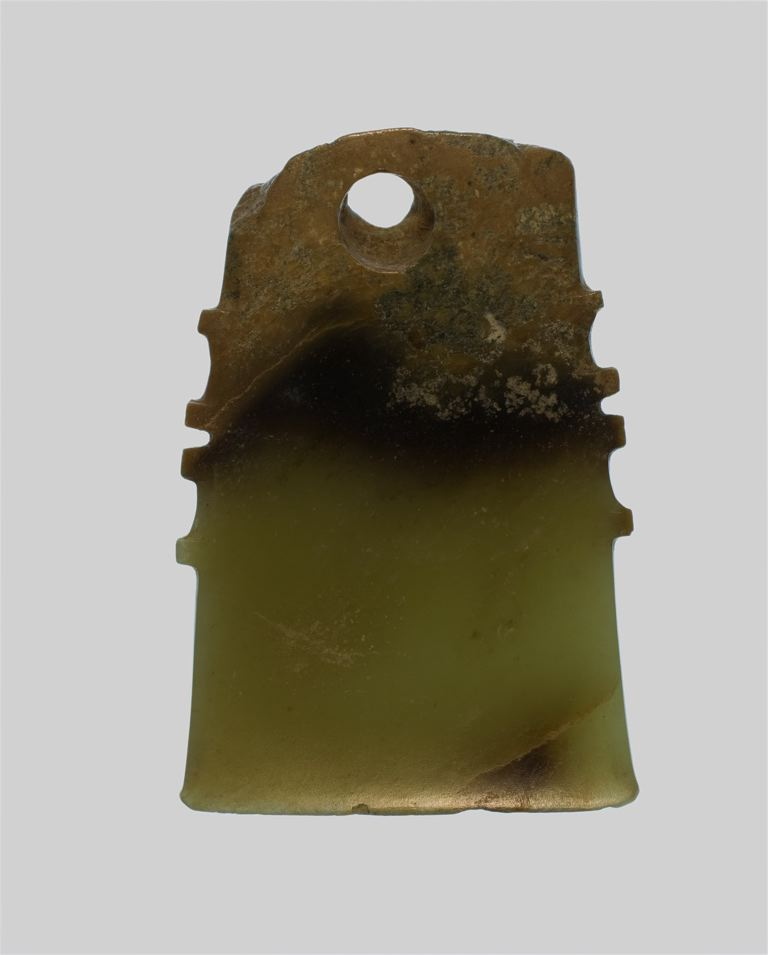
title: Axe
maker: China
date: Shang dynasty (c. 1600–c. 1046 B.C.)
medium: Jade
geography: China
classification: jade; asian art